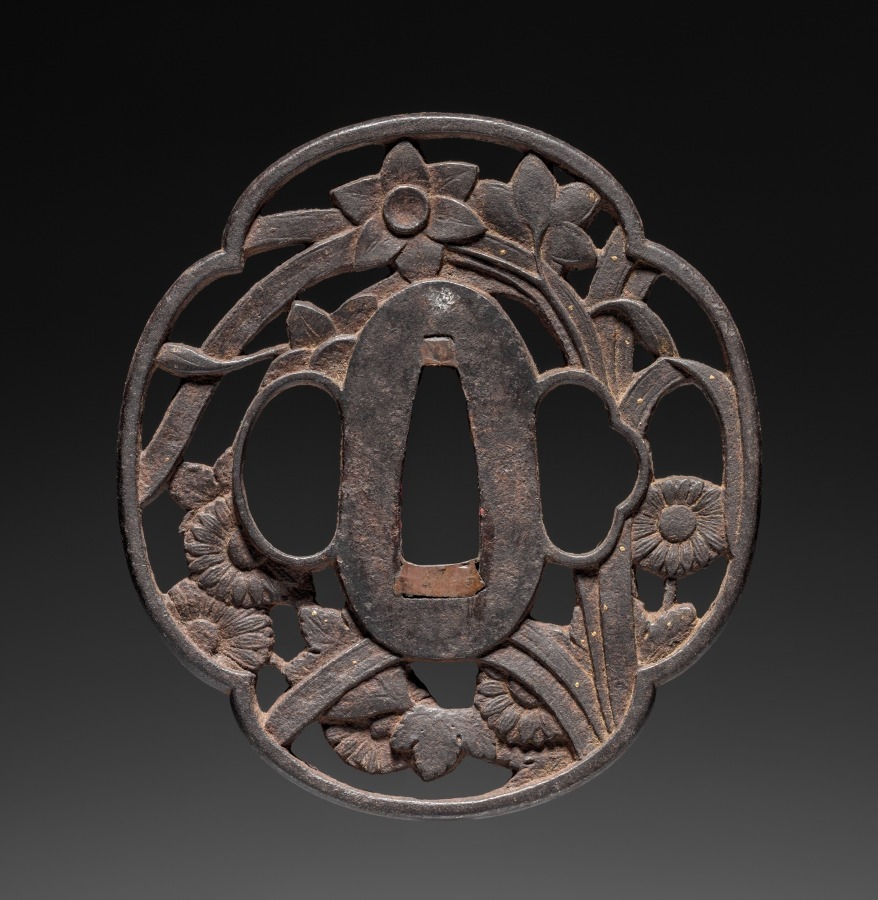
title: Sword Guard (Tsuba)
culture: Japan, Edo period (1615–1868)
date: 1615–1868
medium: iron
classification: Arms and Armor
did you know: This sword guard has been attributed to the Chosu school.